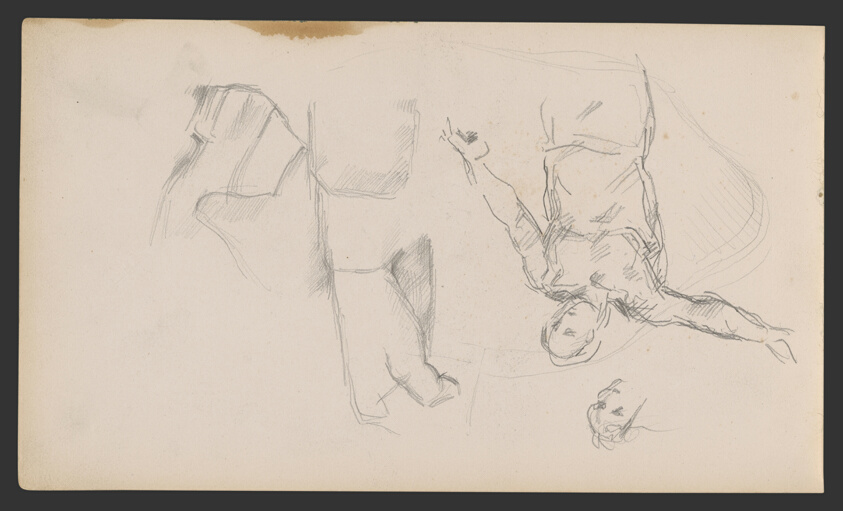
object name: Drawing and Watercolor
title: Sketchbook No. 2 (L'Estaque)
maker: Paul Cézanne; French, 1839-1906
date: 1875–86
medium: Graphite and pen and ink drawings on paper, bound into a book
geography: France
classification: sketchbook; graphite; prints and drawing; paper